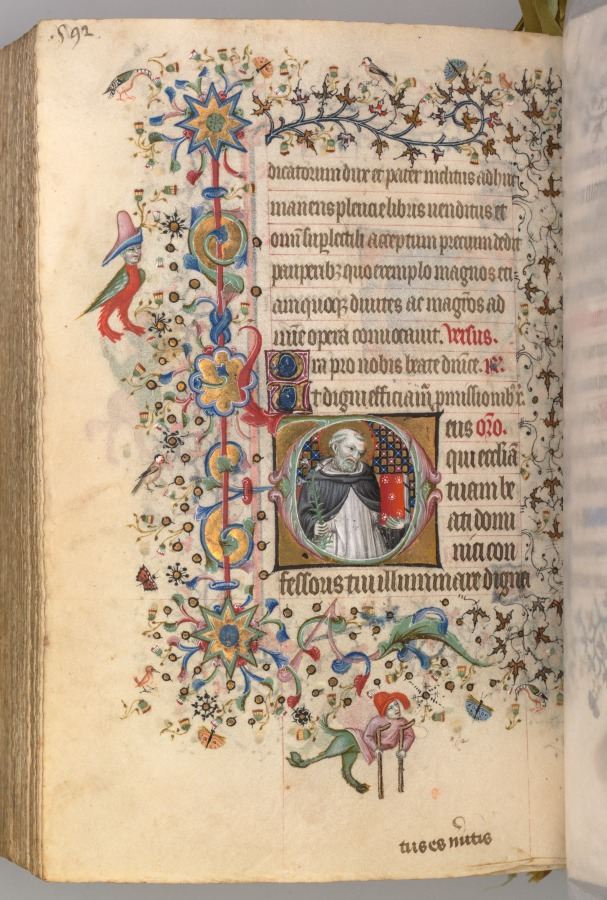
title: Hours of Charles the Noble, King of Navarre (1361-1425): fol. 290v, St. Dominic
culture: France, Paris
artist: Master of the Brussels Initials and Associates (French)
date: c. 1405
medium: ink, tempera, and gold on vellum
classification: Bound Volume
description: This precious volume was obviously highly prized by its owner, the French-born King of Navarre, who had his coat of arms painted on no less than twenty folios. Rather than directly commissioning this manuscript from a specific workshop, it seems that Charles the Noble acquired his book of hours -- perhaps ready-made for the luxury market -- while on a trip to Paris in 1404-05. A collaborative effort, six painting styles are evidenced within the pages of this codex, those of two Italians, two Frenchmen, and two Netherlanders. The painter who was responsible for the planning and decoration of the book, and who produced seventeen of the large miniatures, was a Bolognese artist known as the Master of the Brussels Initials. His principal assistant, responsible for most of the borders, was a Florentine who signed his name "Zecho" da Firenze on folio 208 verso.